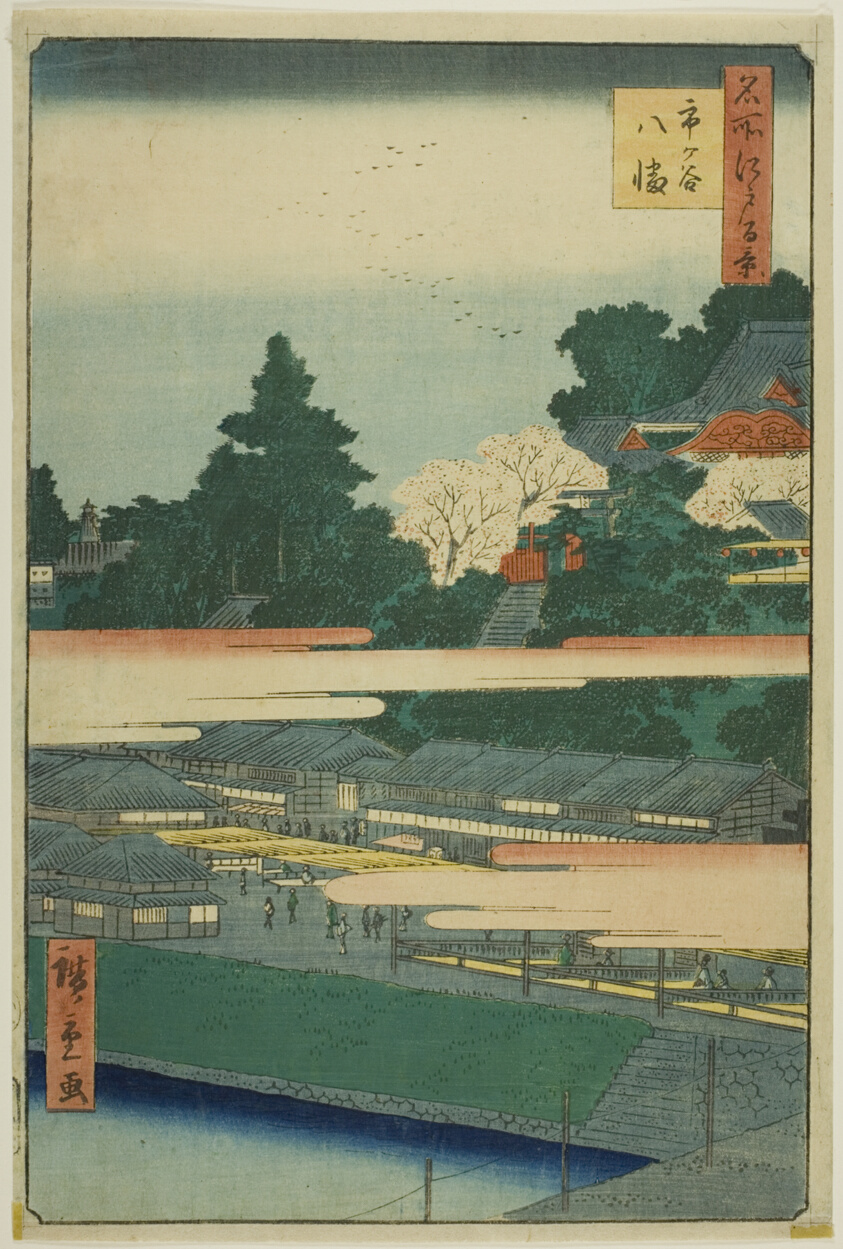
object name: Print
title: Ichigaya Hachiman Shrine (Ichigaya Hachiman), from the series “One Hundred Famous Views of Edo (Meisho Edo hyakkei)”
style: Japanese (culture or style)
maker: Utagawa Hiroshige 歌川 広重; Japanese, 1797–1858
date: 1858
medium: Color woodblock print; oban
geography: Japan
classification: woodblock print; print